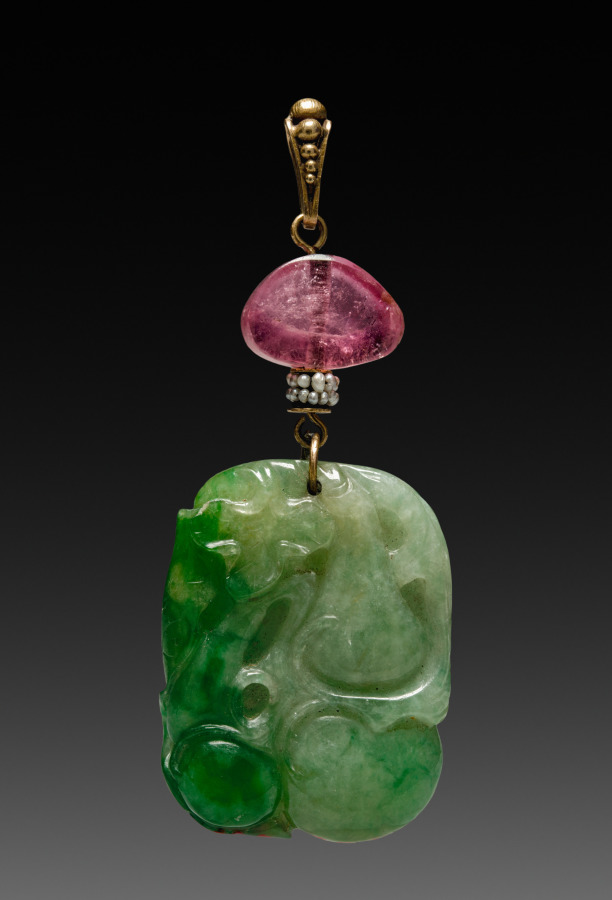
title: Pendant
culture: China, Qing dynasty (1644-1911)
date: 1644–1911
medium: gold, carved green jade, rose quartz, and seed pearls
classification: Jewelry